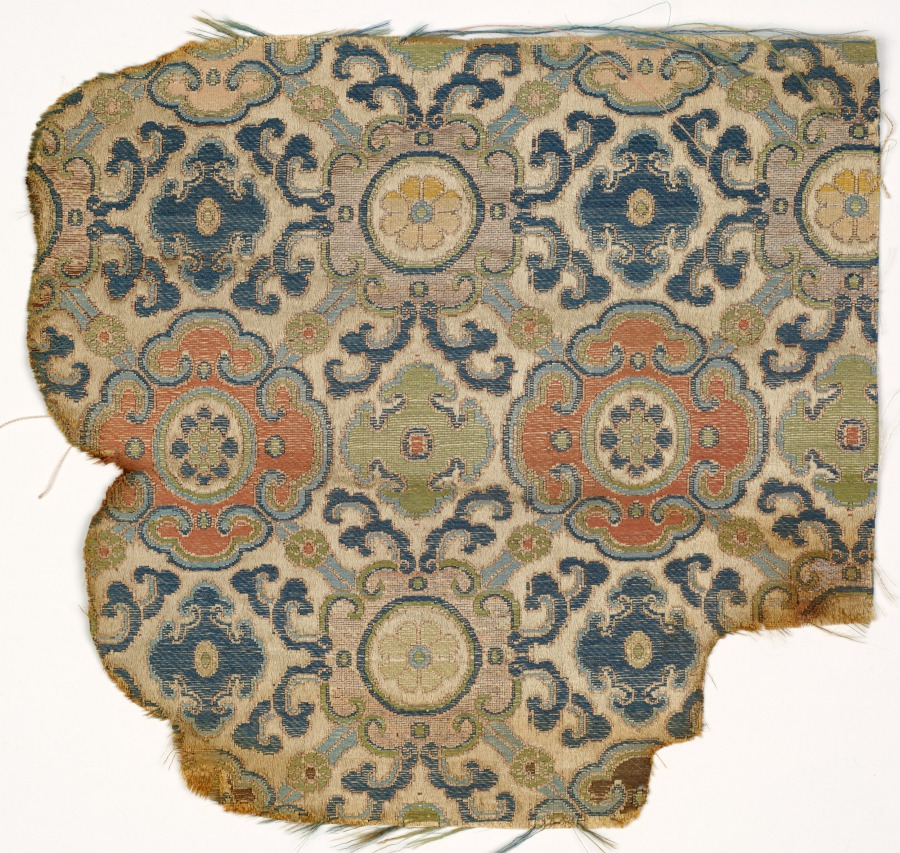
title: Fragment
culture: China, 19th century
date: 1800s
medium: silk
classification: Textile